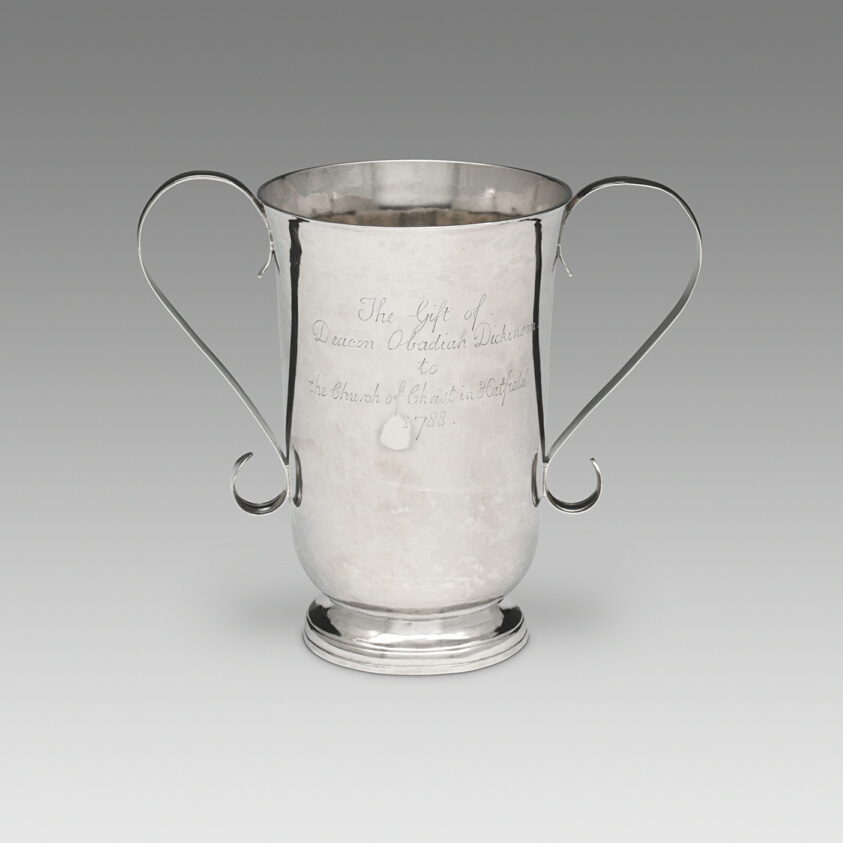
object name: Metalwork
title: Cup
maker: Benjamin Pierpont; American, 1730–1797; Boston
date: 1788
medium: Silver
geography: Boston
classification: drinking vessel; silver; american decorative arts; american arts; decorative arts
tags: dining, drinking